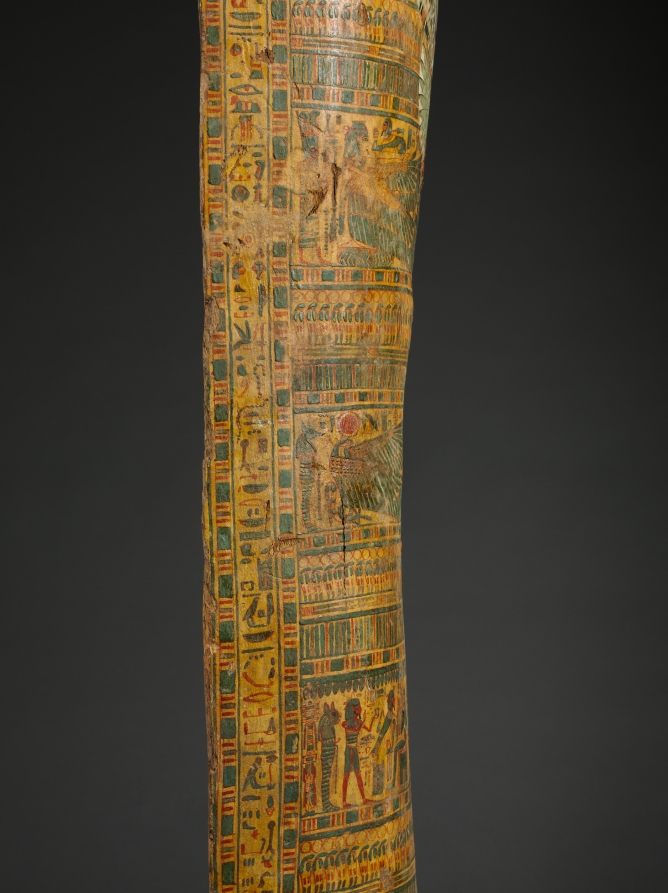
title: Coffin of Bakenmut (lid)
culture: Egypt, Thebes, Third Intermediate (1069–715 BCE), Dynasties 21–22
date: c. 1000–900 BCE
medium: gessoed and painted sycamore fig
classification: Funerary Equipment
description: The coffin of Bakenmut is one of the finest examples of painted wooden coffins made for the priests of Amen and their families at Thebes during Dynasty 21 and early Dynasty 22. The pharaohs of this time were no longer buried in the Valley of the Kings, but instead built tombs in the Delta, far to the north, where they resided. Security was lax in the Theban necropolis. The coffins and funerary goods of the wealthy citizens of Thebes were placed in unmarked and undecorated family tombs cut into the cliffs on the west bank of the Nile. All the care and detail that in more prosperous times were devoted to the decoration of the tomb chapel were now lavished on the elaborately painted coffins. Every available surface is crowded with religious scenes, images of funerary gods and goddesses, protective spells, and magical symbols. The deceased appears mummiform. An elaborate floral collar entirely covers the upper body, exposing only the separately attached hands (now lost). A pair of red "mummy braces" are crossed over the chest, their point of intersection marked by a winged sun disk. The lower body is covered with tiny figures modeled in gesso against a yellow background, which gives the effect of gold inlaid with glass or semiprecious stone. The decoration on the interior features two deified dead kings of Dynasty 18. Although these rulers had lived centuries before, memory of their greatness was still very much alive. The main scene near the top depicts Tuthmosis III, the great military pharaoh, who lived 500 years before Bakenmut. Posed as a mummy, the ruler wears a brilliant feathered garment enfolding him with falcon’s wings. The scene below features back-to-back seated images of Amenhotep I, regarded as the patron of the Theban cemetery and worshiped as a local god there.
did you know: Originally another smaller coffin was placed inside this outer coffin and in that the deceased with a mummy board would have rested.